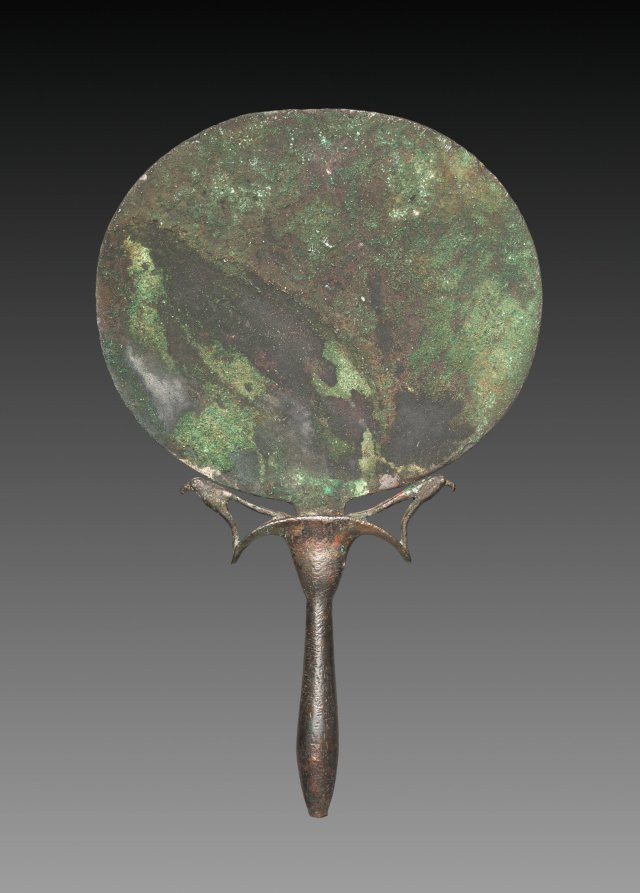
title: Mirror with Falcons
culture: Egypt, New Kingdom (1540–1069 BCE), Dynasty 18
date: 1540–1296 BCE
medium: mirror of copper, handle of tin-bronze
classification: Cosmetic Objects